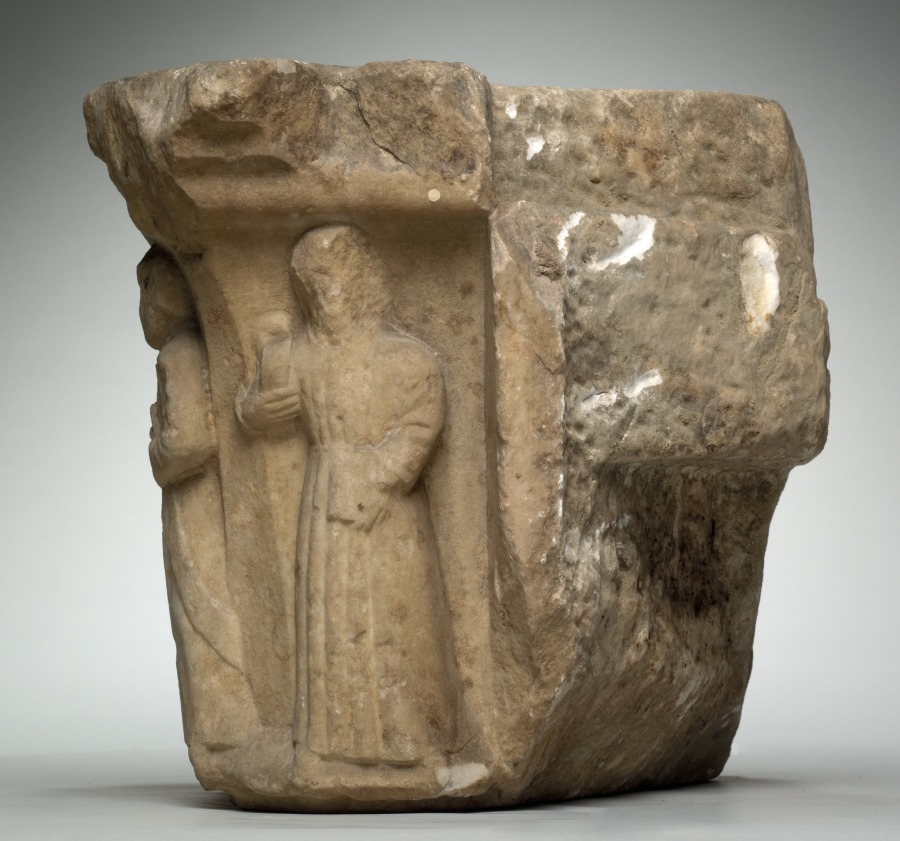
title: Engaged Capital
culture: Southern France, Abbey of Larreule, near Tarbes, 15th century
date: 1400s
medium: limestone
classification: Sculpture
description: This capital belongs to a surviving group including other architectural fragments that once decorated the cloister of the Abbey of Larreule. A cloister was a covered walkway or arcade, usually around all four sides of a square area of grass (the "cloister garth"). The seclusion of the cloister was the monks’ exclusive domain, off limits to others. Here, the monks were supposed to pray, study, meditate, and exercise in privacy and solitude. Such cloister capitals served both to instruct the monks and as a focus for their devotions. Other capitals in this series are installed in the Jardin Massey at Tarbes, near the original abbey. An arch from Larreule has been assembled with other associated French capitals at The Cloisters in New York.